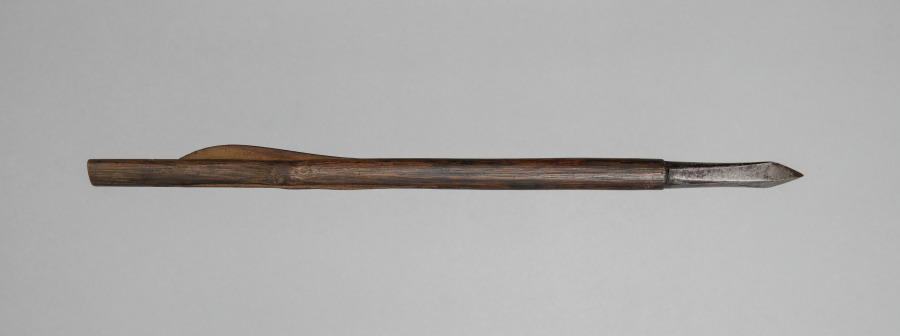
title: Crossbow Bolt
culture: Germany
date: 1500s-1600s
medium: wood, leather, steel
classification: Arms and Armor